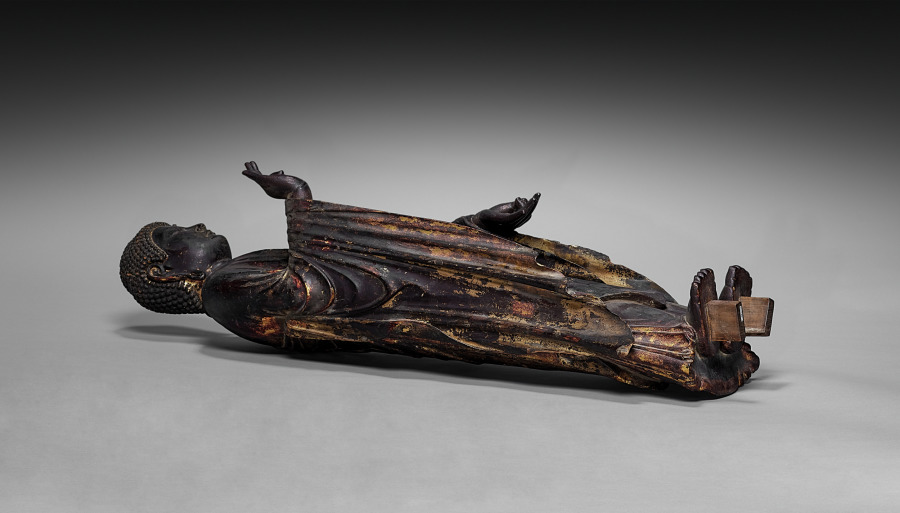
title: Amida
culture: Japan, Kamakura period (1185–1333)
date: 1200s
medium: Wood with lacquer and gilding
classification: Sculpture